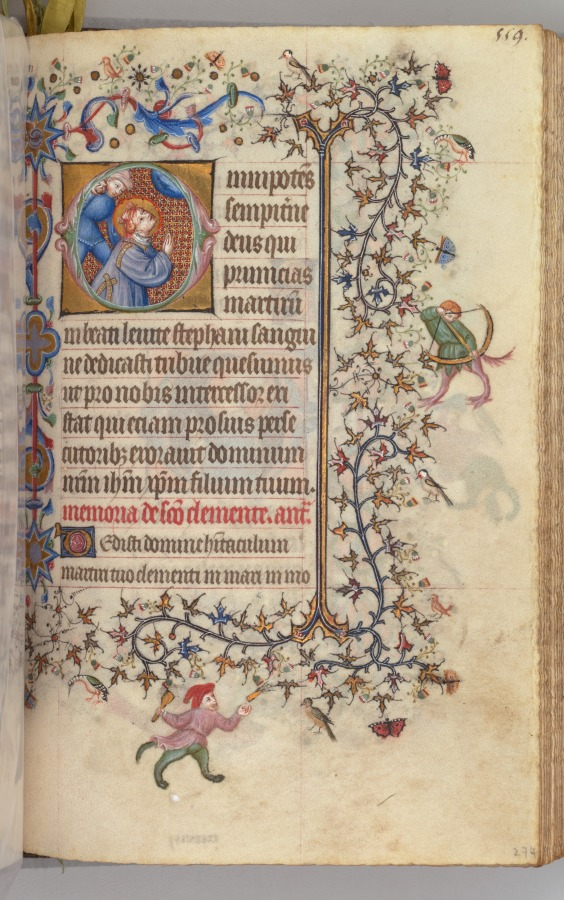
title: Hours of Charles the Noble, King of Navarre (1361-1425): fol. 274r, St. Stephen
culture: France, Paris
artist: Master of the Brussels Initials and Associates (French)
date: c. 1405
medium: ink, tempera, and gold on vellum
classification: Bound Volume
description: This precious volume was obviously highly prized by its owner, the French-born King of Navarre, who had his coat of arms painted on no less than twenty folios. Rather than directly commissioning this manuscript from a specific workshop, it seems that Charles the Noble acquired his book of hours -- perhaps ready-made for the luxury market -- while on a trip to Paris in 1404-05. A collaborative effort, six painting styles are evidenced within the pages of this codex, those of two Italians, two Frenchmen, and two Netherlanders. The painter who was responsible for the planning and decoration of the book, and who produced seventeen of the large miniatures, was a Bolognese artist known as the Master of the Brussels Initials. His principal assistant, responsible for most of the borders, was a Florentine who signed his name "Zecho" da Firenze on folio 208 verso.